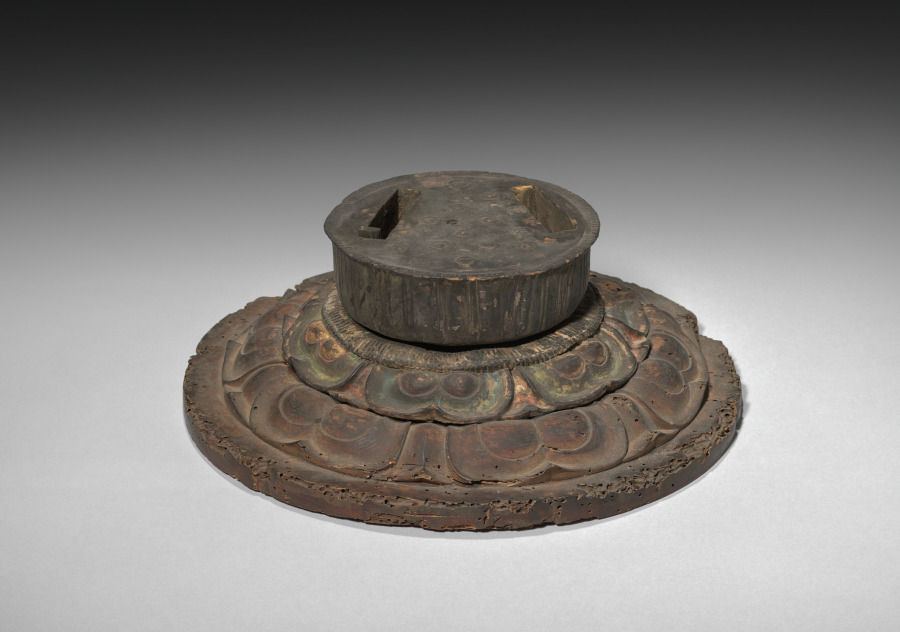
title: Kannon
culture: Japan, Kamakura period (1185–1333)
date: early 1200s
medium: wood with lacquer and gold leaf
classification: Sculpture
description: Kannon, the bodhisattva of compassion, is one of the two bodhisattvas attending Amida, the Buddha of the Western Paradise. The sculpture stands on a lotus pedestal, holding a lotus dais on which the soul of the faithful is received into paradise. The use of gold was prevalent in Buddhist art during this time—it was believed that the yellow light permeated the regions of the Amida—and Amida worship prevailed throughout Japan.